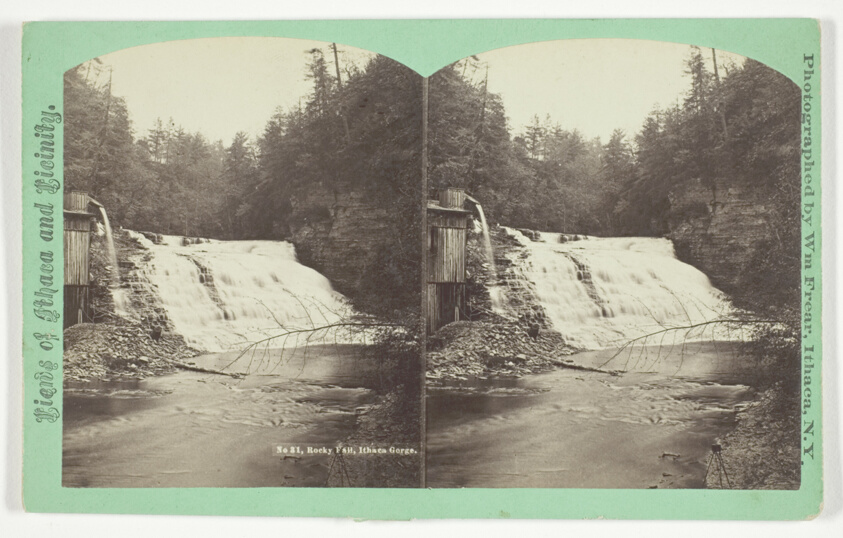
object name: Photograph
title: Rocky Fall, Ithaca Gorge, No. 31 from the series "Views of Ithaca and Vicinity"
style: 19th century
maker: William Frear (American, active late 19th century)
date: Late 19th century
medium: Albumen print, stereo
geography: Ithaca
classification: photography; photograph; albumen silver print; stereograph (albumen)